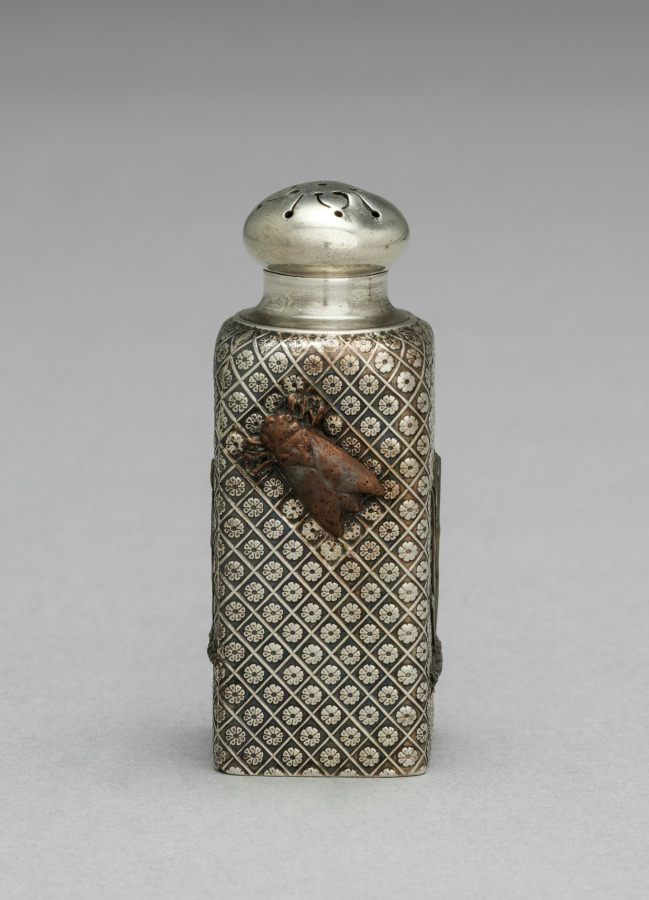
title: Salt Shaker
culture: America, Rhode Island, Providence, 19th century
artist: Gorham Manufacturing Company (America, est. 1831)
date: c.1875–1885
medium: silver and mixed metals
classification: Silver